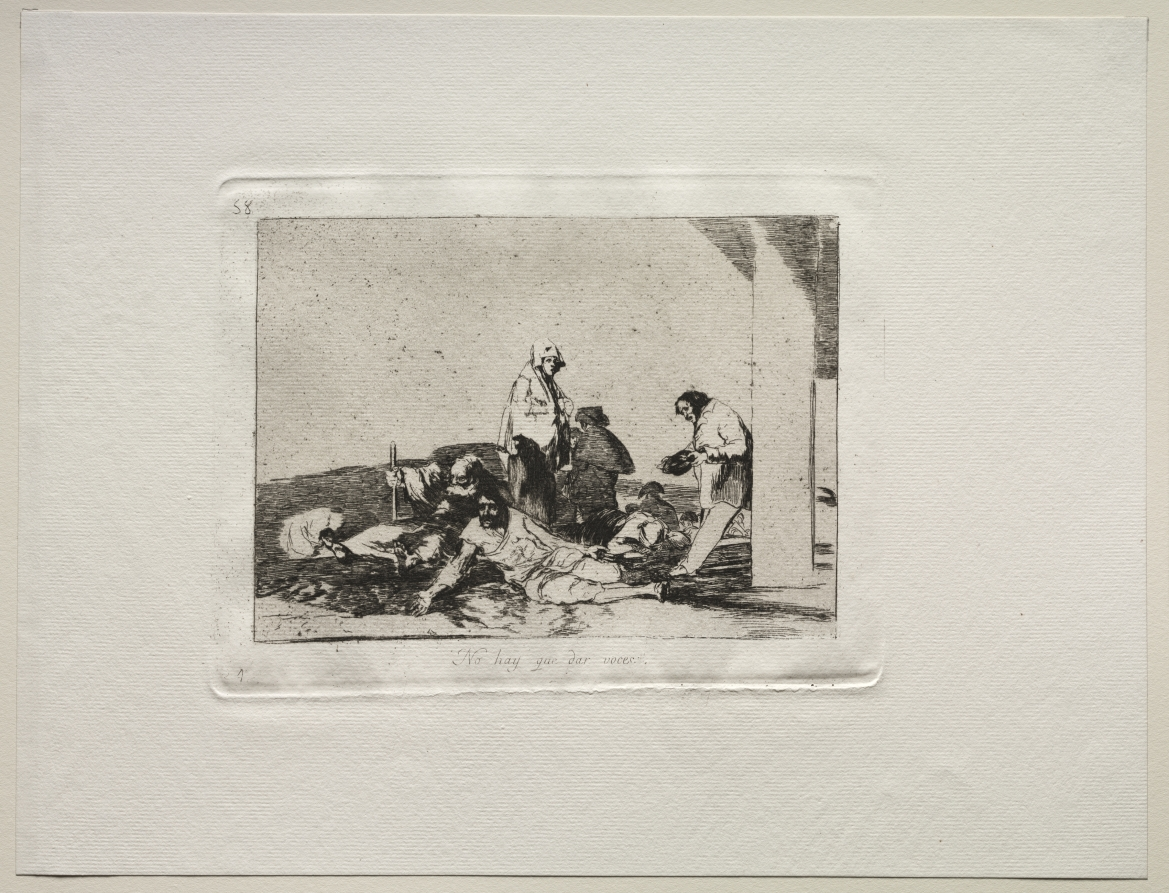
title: The Horrors of War: It's No Use Crying Out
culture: Spain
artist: Francisco de Goya (Spanish, 1746–1828)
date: c. 1810–20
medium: etching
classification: Print